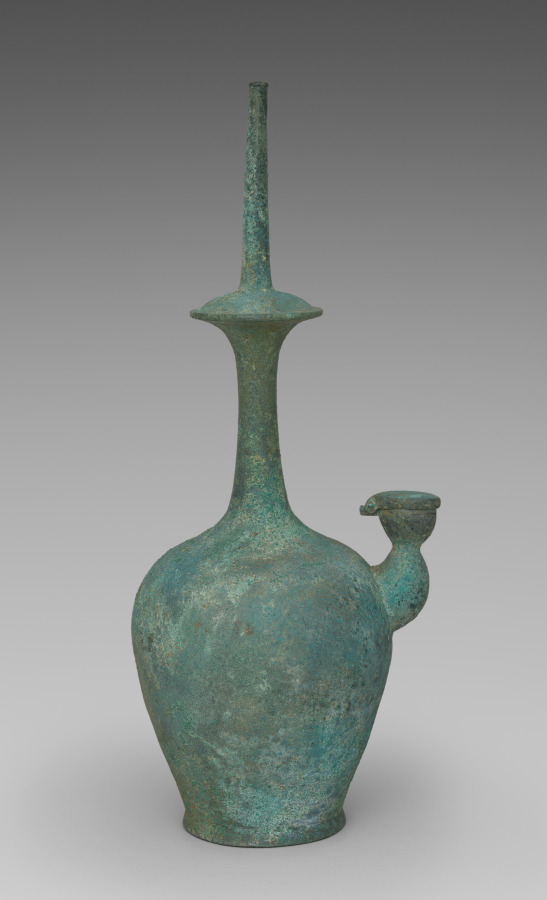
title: Water Ewer for Rituals (Kundika)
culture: Korea, Goryeo dynasty (918–1392)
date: 1100s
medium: bronze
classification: Metalwork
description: Known as kundika in Sanskrit, this distinctively shaped vessel served to purify a sacred space and to invoke a deity. In Korean Buddhist art, it appears primarily as an attribute of the Bodhisattva Avalokitesvara (Gwaneum in Korean). By the 1100s, however, the kundika was used as aristocrats’ fancy water container for everyday use.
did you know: This distinctively shaped vessel is called a kundika in Sanskrit, simply referring to a water bottle.